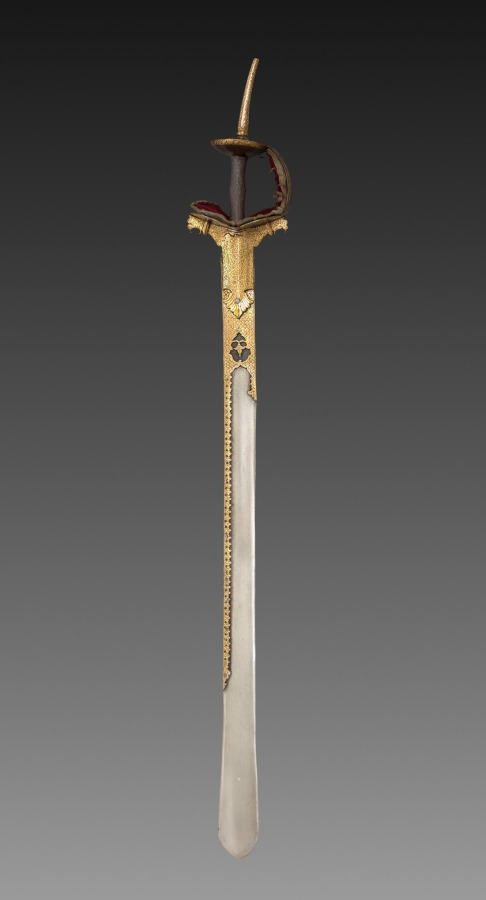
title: Sword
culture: India, perhaps Deccan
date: 1700s–1800s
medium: Watered steel blade with iron hilt inlaid with gold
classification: Arms and Armor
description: Straight swords were typical of those used among military and aristocratic circles in the southern regions of the Deccan, in contrast to the curved swords favored by Central Asian equestrians. Increased contact between the Mughal north and the Deccan south during the 1600s led to the appearance of the Deccan-style sword in courtly portraits made during the time of Jahangir and Shah Jahan, and later.